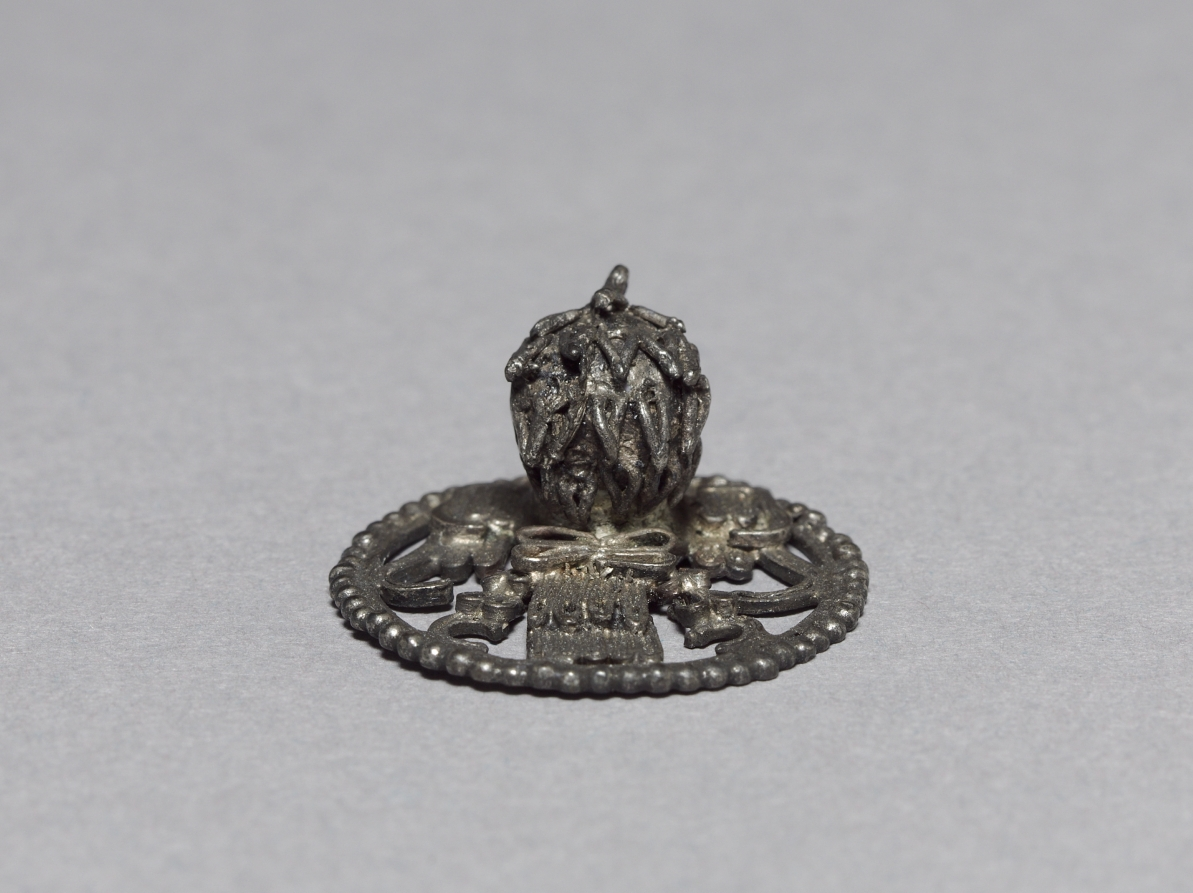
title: Eagle Ornament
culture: Mexican, Oaxaca, Mixtec style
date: c. 1200–1519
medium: silver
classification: Metalwork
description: An additional ornament probably once dangled from the eagle's beak. Similar jewelry has been found in high status Mixtec tombs at Zaachila and at Monte Albán, a Zapotec site controlled by the Mixtec after about AD 750.